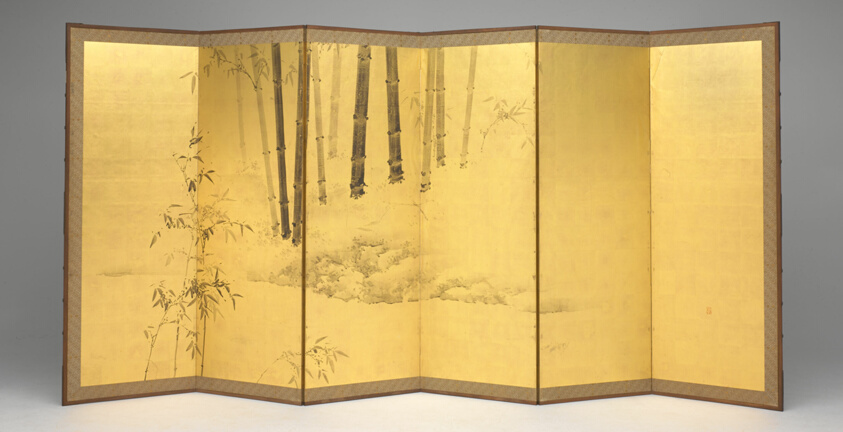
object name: Furniture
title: Bamboo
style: Japanese (culture or style)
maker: Kishi Ganku (Japanese, 1749-1838)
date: Early 19th century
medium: Pair of six-panel screens; ink and gold leaf on paper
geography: Japan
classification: screen; painting; asian art; furniture